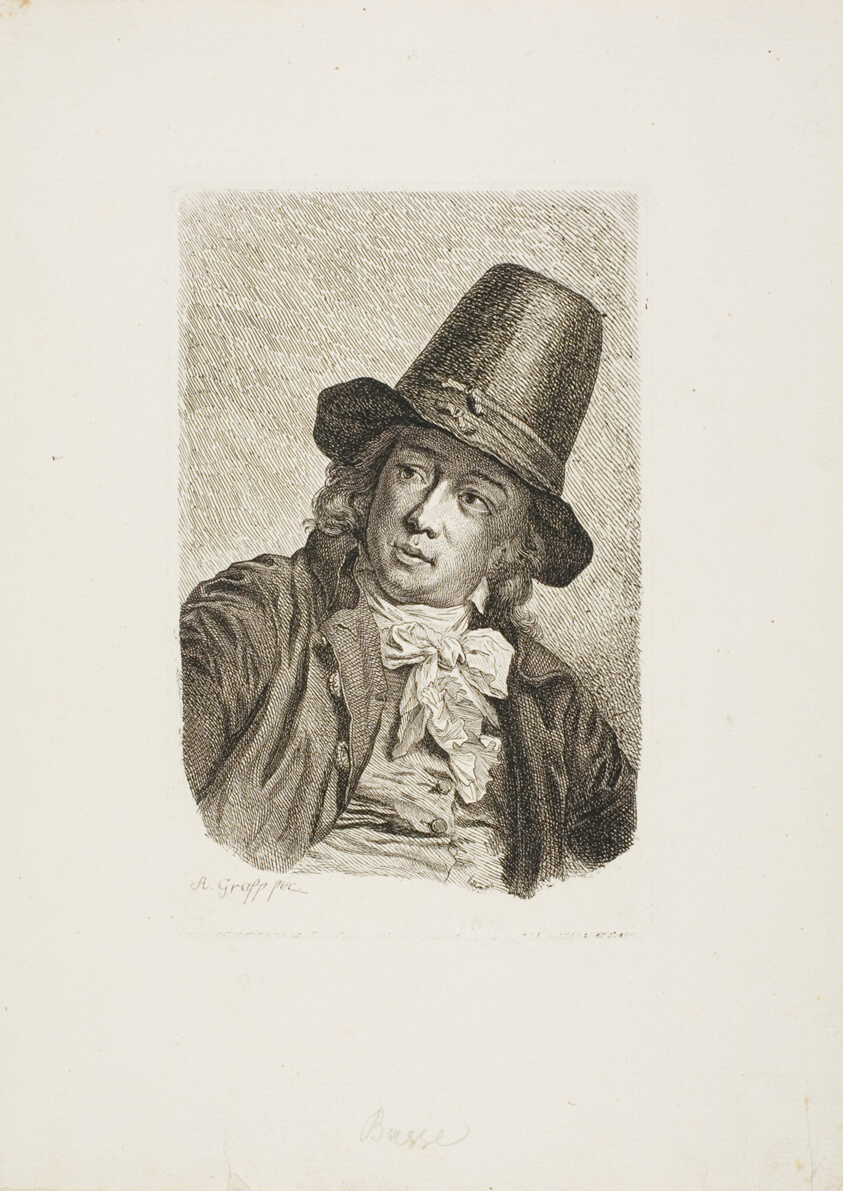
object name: Print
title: Portrait of Abraham Bosse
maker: Anton Graff (German, born Switzerland, 1736-1813)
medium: Engraving on ivory laid paper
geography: Germany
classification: etching; print; prints and drawing